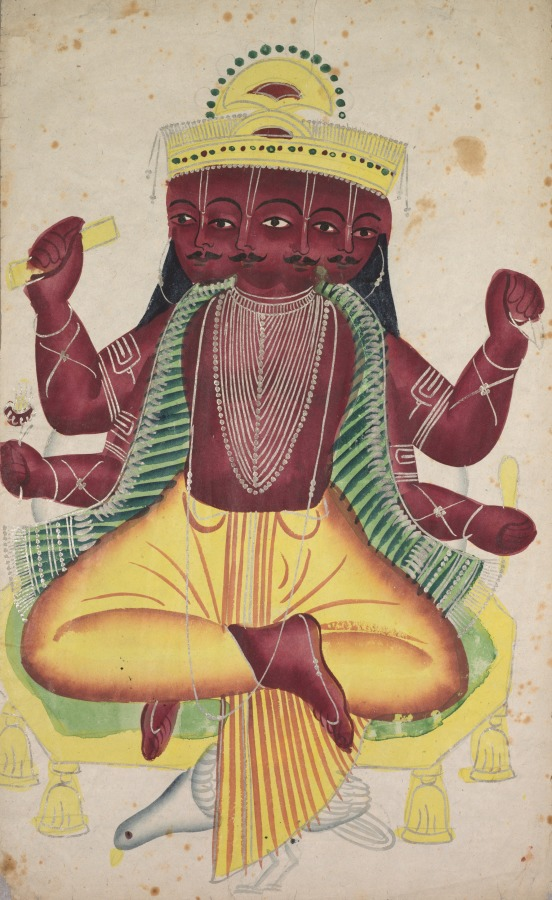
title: Brahma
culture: Eastern India, Bengal, Kolkata, Kalighat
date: c. 1890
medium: Gum tempera, graphite, ink, and tin on paper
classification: Painting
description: The god of creation has four arms and four heads. The manuscript in his upper right hand indicates that he is the source of sacred knowledge as the quintessential Brahman. The lotus flower in his lower right hand references birth and procreation. He would typically hold a rosary and water pot in his left hands, which are here difficult to clearly identify given the cursory style of Kalighat painitngs. His mount, the goose, examines the ground at his feet.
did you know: Brahma once had five heads, but the god Shiva decapitated one of them.